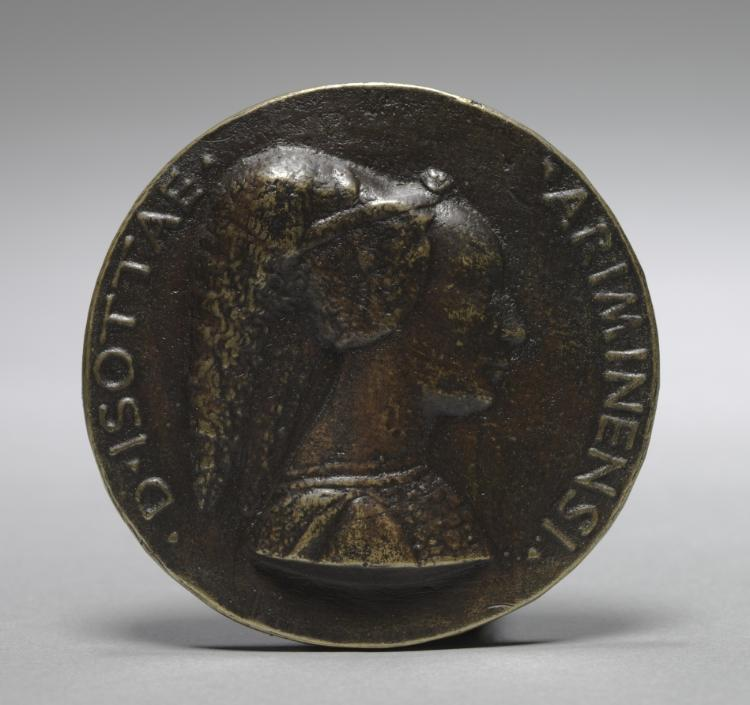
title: Medal of Isotta degli Atti da Rimini (obverse)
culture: Italy, 15th century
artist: Matteo de' Pasti (Italian, 1420–1467/68)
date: 15th century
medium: bronze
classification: Sculpture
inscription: obverse: "D ISOTTAE ARIMINENSI"